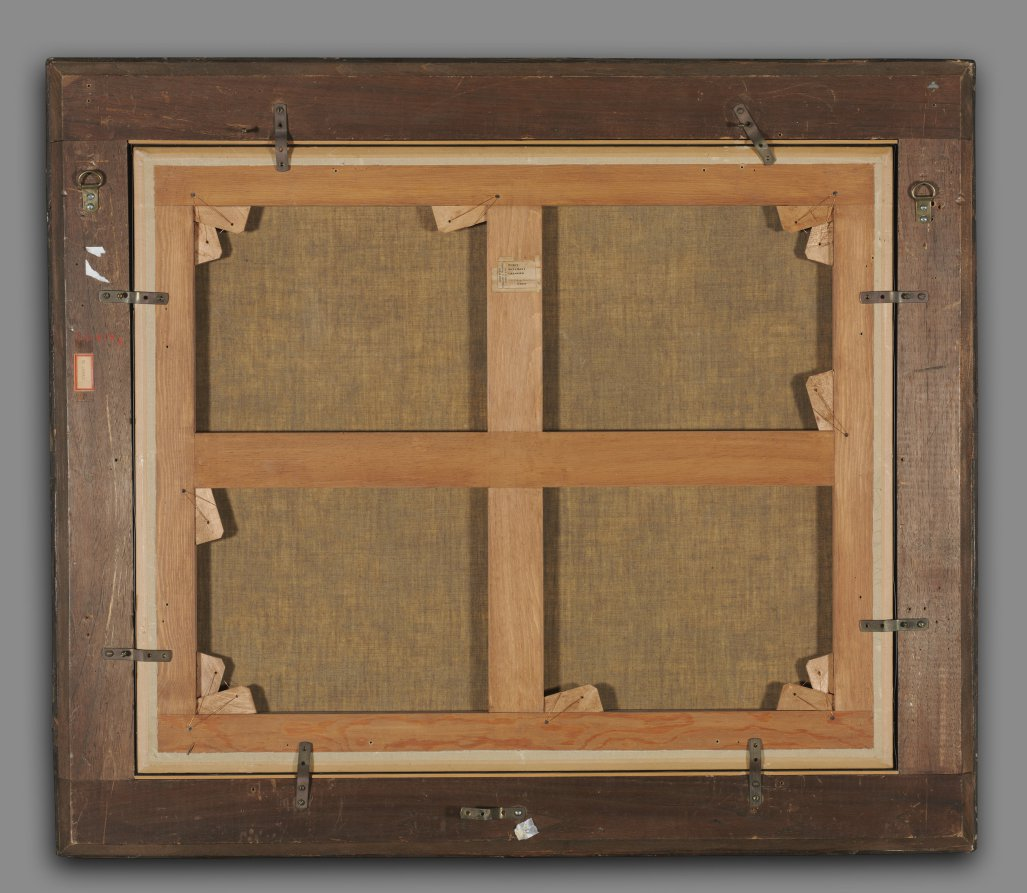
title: Herengracht, Amsterdam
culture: Netherlands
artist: Jan Wijnants (Dutch, 1635–1684)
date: c. 1661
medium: oil on canvas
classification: Painting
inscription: Signed lower left: "J. Wijnants [with remains of an inscription below]"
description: This painting is the first depiction of Amsterdam in which a canal is given prominence. Flanked by picturesque, tree-lined avenues and exquisite mansions, the Herengracht (Gentleman's Canal) was one of Amsterdam's most important waterways. The precision with which Jan Wijnants portrayed the topography of the city enables the viewer to witness the development of this location. To the left of the canal, Wijnants depicted a lumber yard, on which, in 1662, the architect Philip Vingoboons built four houses for the merchant Jacob Cromhout. Furthermore, soon after Wijanants completed this painting the canal was expanded.